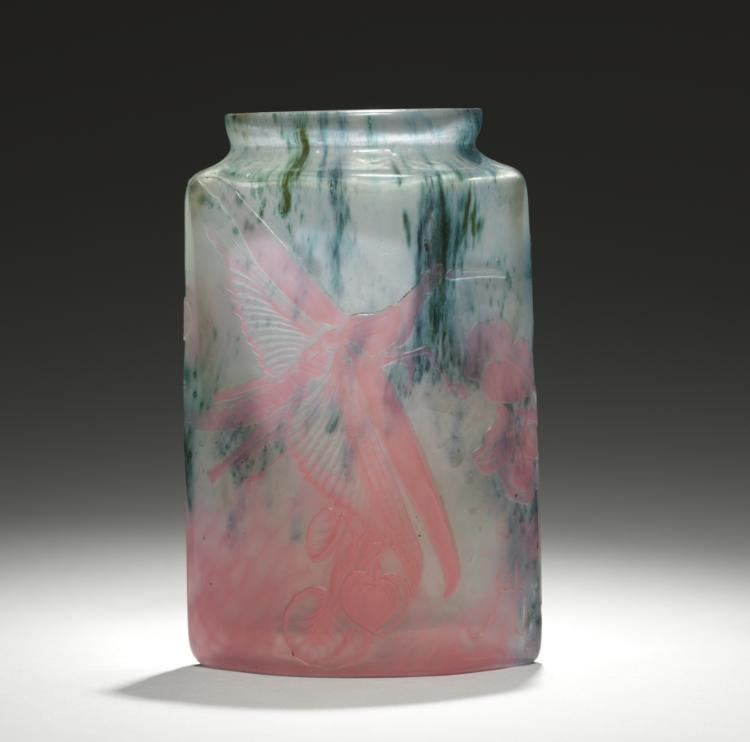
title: Vase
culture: France, early 20th Century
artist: Emile Gallé (French, 1846–1904)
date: c. 1900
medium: glass with pink and green inclusions, cameo cut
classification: Glass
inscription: inscribed in Japanese style, lower right: Gallé.